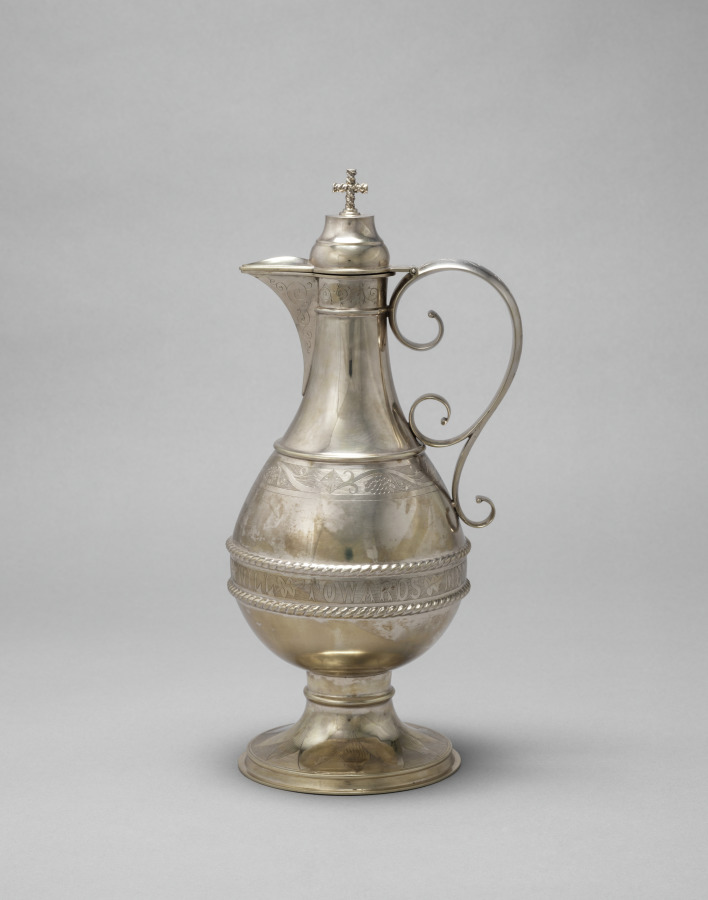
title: Flagon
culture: America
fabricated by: Francis W. Cooper (American)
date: c. 1853–1855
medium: silver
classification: Silver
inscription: engraved inscription around waist: "ON EARTH PEACE GOOD WILL TOWARDS MEN."